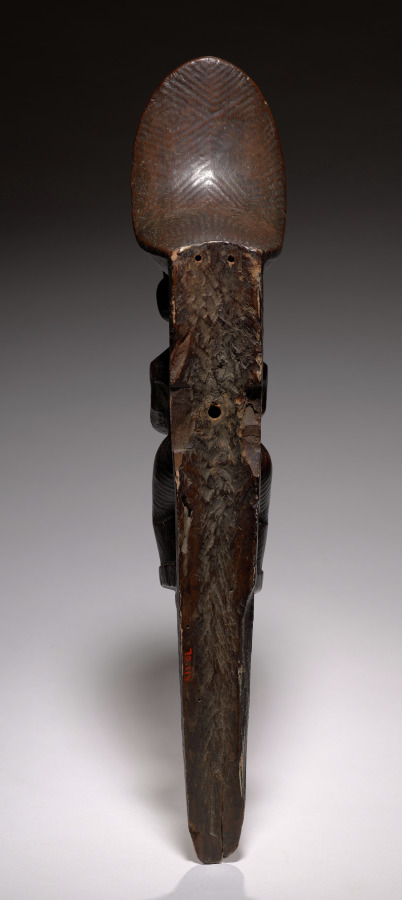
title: Stilt Footrest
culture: Polynesia, Marquesas Islands, 19th century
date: early 1800s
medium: wood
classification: Sculpture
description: Stilt walking and knockdown stilt contests were favorite forms of amusement and competition on the Marquesas Islands. The decorated footrest was secured to a six-foot stilt pole by wrapping sennit fiber cord through a wide slit at the carved figure's back and around the pointed end. Champion stilt walkers competed with those from other tribes during great festivals. Special artists carved the footrests from hardwood and cured them in the mud of a taro patch.